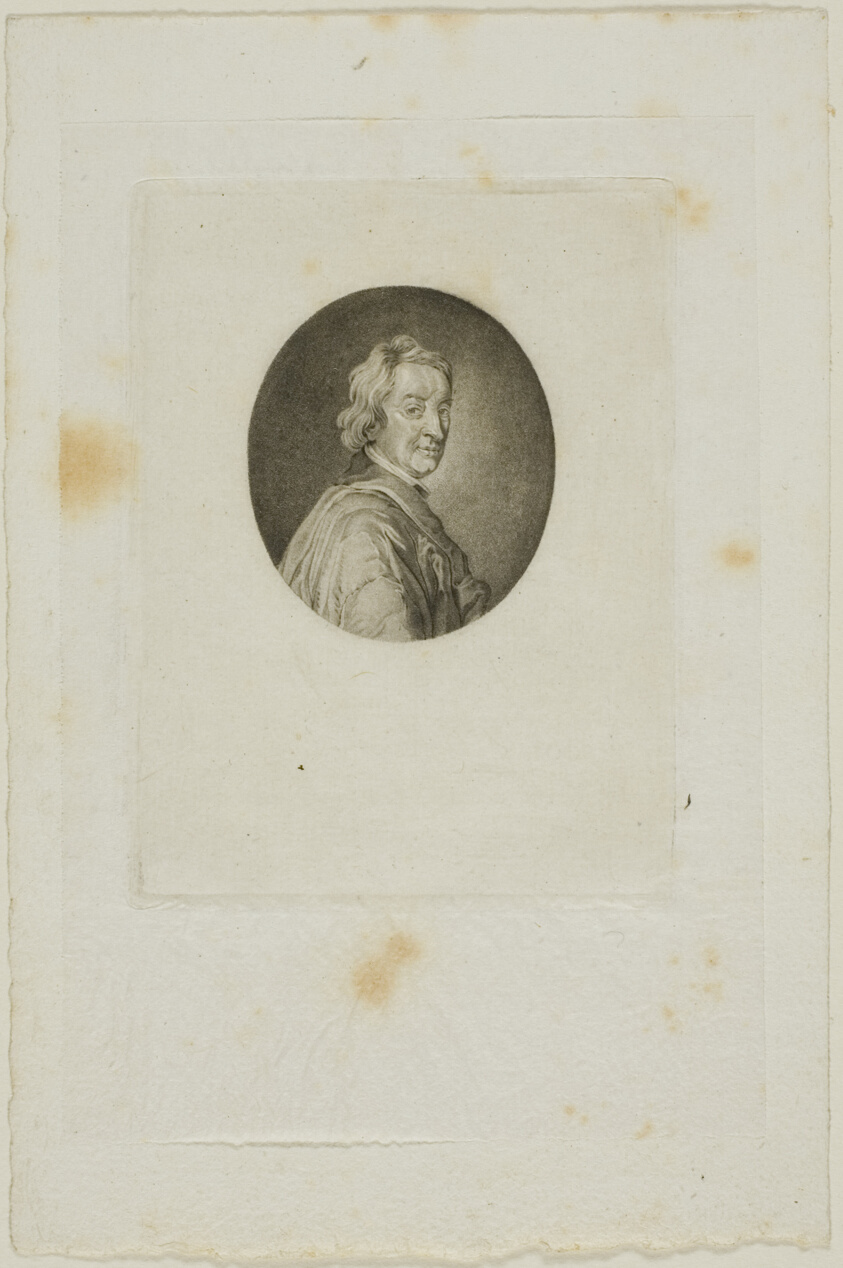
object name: Print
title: John Dryden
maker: Jean-Baptiste de Grateloup (French, 1735-1817); Jean Pierre Sylvestre (French)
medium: Engraving on paper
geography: France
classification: aquatint; print; prints and drawing